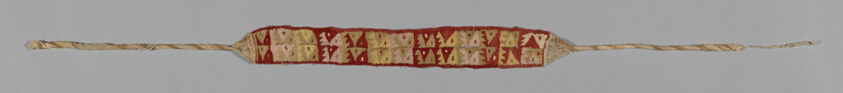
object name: Textile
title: Headband or Belt Fragment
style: inca, andean, andes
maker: Provincial Inca; Probably south coast, Peru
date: A.D. 1476/1532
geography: Peru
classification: textile; weaving; costume; dress (garment); clothing